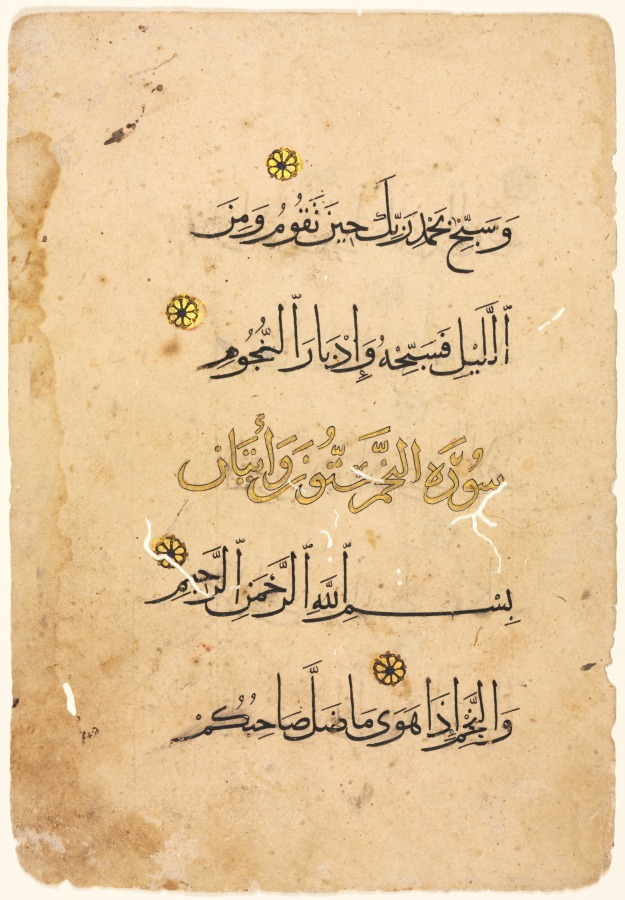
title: Qur'an Manuscript Folio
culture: Egypt, Mamluk sultanate (1250–1517)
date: 1300s–1400s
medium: ink, gold, and colors on paper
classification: Drawing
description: It is through the Arabic language that the Qur’an was revealed to the Prophet Muhammad in the 600s. As a result, calligraphy is celebrated as the highest form in Islamic art. The verses (ayat) written here come from the 53rd chapter (surah) of the Qur’an, also known as the Surah An-Najm, the Chapter of the Star. The significance of the Qur’an provides an explanation for the importance of calligraphy, but its use was not restricted to religious texts. Many objects in the museum's Islamic collection bear calligraphic inscriptions and come from secular contexts, displaying the versatility and creativity of this art form.